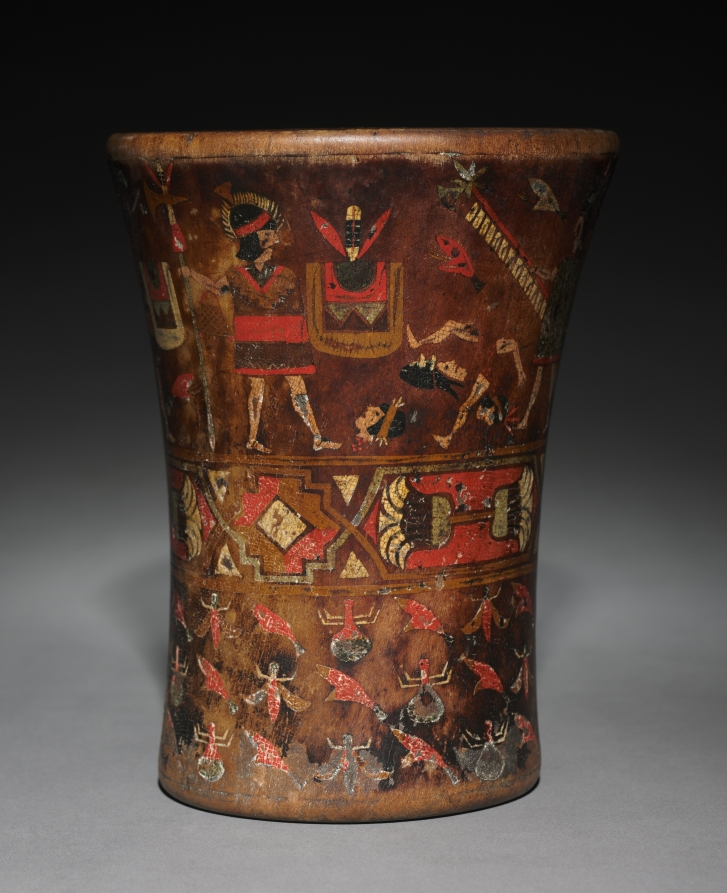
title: Kero (Waisted Cup)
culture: Peru, Colonial Inka style, 16th century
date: after 1550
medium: wood, inlaid pigments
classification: Wood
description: Keros, used to drink the maize beer chicha, were essential items of Inka statecraft. Made and used in pairs, they reflect the important Andean concept of reciprocity. Native use of keros continued in the colonial period, the date of these two examples, which come from separate pairs. The example with geometric motifs is closest to pre-conquest models. On the second, two armies converge: the Inka, dressed in tunics with waistbands, and their opponents, perhaps jungle people whose body parts are heaped in a centerpiece.